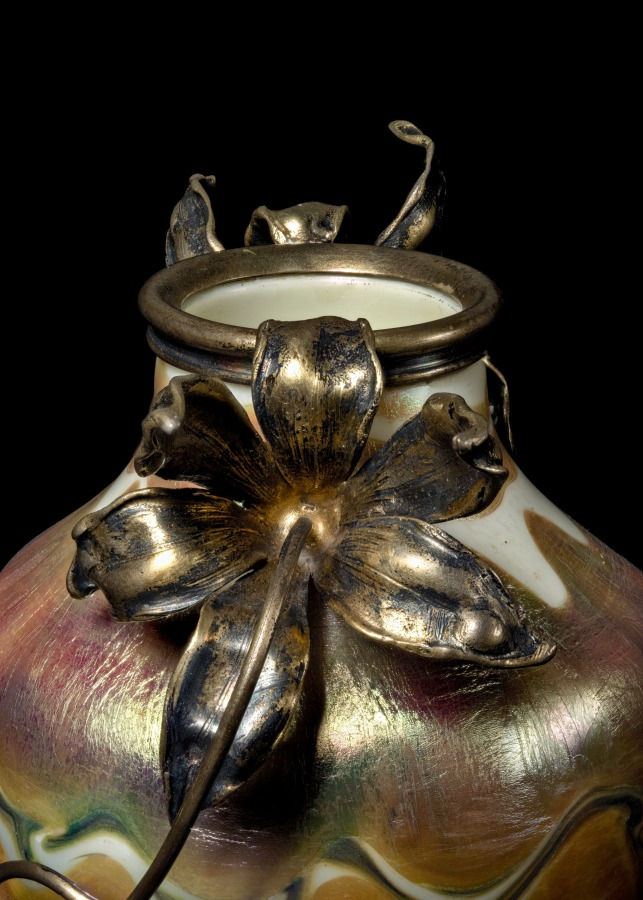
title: Vase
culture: America, New York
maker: Tiffany Glass & Decorating Company (America, New York, 1892–1902)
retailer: Siegfried Bing (German, active in France, 1838–1905)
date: c. 1900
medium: Favrile glass, silver mount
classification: Glass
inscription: Louis C. Tiffany o10301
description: This small vase is made of Louis Comfort Tiffany's signature Favrile glass. Early on when Tiffany began collaborating with glass artists on new types of production, his aesthetic ambitions were realized in the development of Favrile glass, deliberately named to sound French, expensive, and “handmade.” Largely through Tiffany's marketing ability, Favrile glass became America’s greatest contribution to the Art Nouveau style. His works were exhibited at international expositions; galleries in major European cities, where his creations were bought by many museums; and in his store in Manhattan, known as the Tiffany Glass and Decorating Co., later Tiffany Studios. Along with the many shapes and sizes of his decorative vases, Tiffany used Favrile glass in mosaic panels, stained glass windows, and his artistic line of table and floor lamps.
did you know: This vase has French mounts indicating that it was likely sold by Louis Comfort Tiffany's agent in Paris, Siegfried Bing, who helped popularize Tiffany's designs throughout Europe.